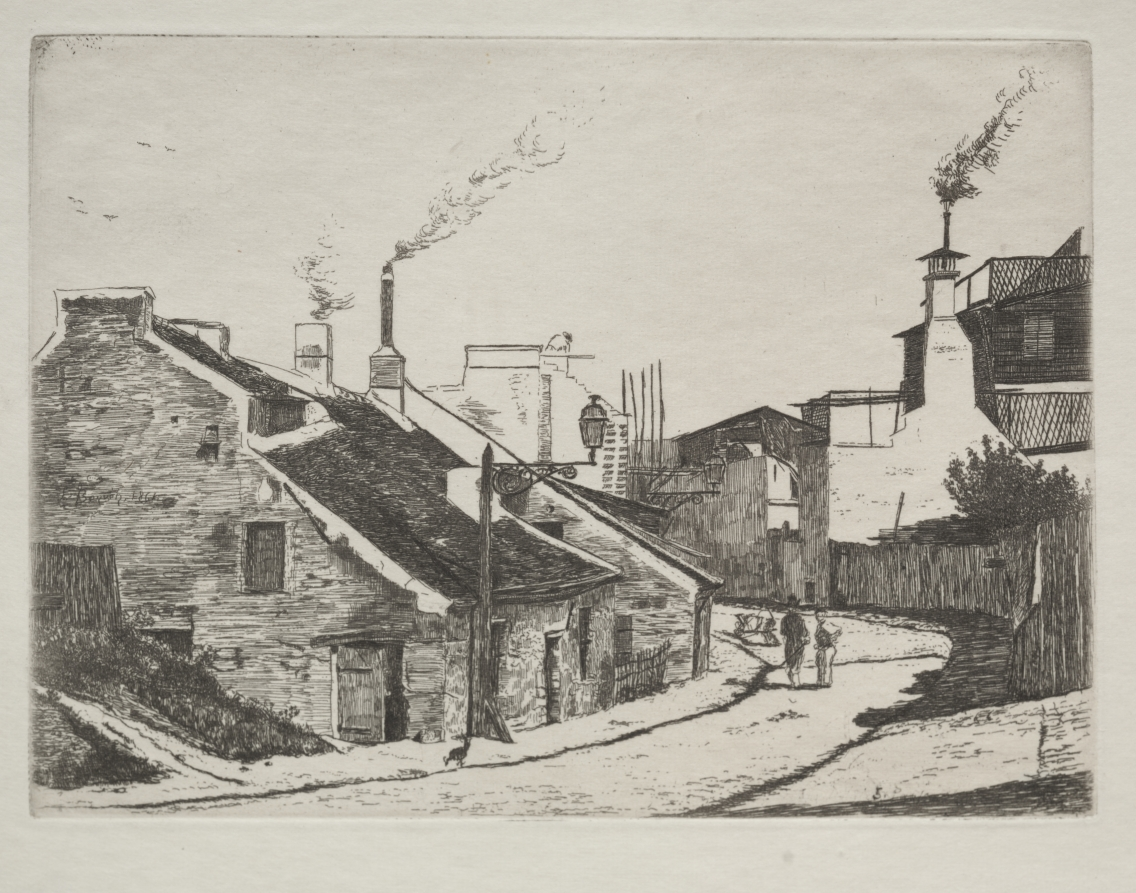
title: Country Street in Alouette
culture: France, 19th century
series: the series, Six Eaux-Fortes, Desinées et Gravées par F. Bonvin, Peintre (fifth of six etchings)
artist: François Bonvin (French, 1817–1887)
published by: Published by François Bonvin; Printed by Auguste Delâtre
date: 1861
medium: etching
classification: Print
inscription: signed, center left, in plate: F Bonvin dated, center left, in plate: 1861 lower right, in plate: 5